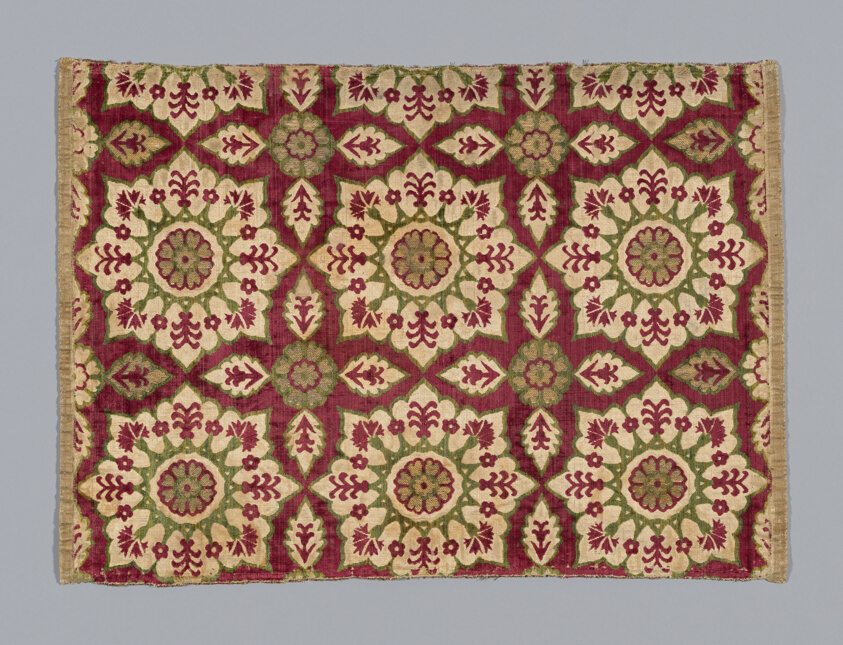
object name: Textile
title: Panel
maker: Turkey, Bursa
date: 1550/1600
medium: Silk, cotton, metal-wrapped silk threads, warp-float faced satin weave with supplementary brocading wefts, supplementary binding wefts, and supplementary warps forming voided and cut velvet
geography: Turkey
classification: textile; weaving - velvet